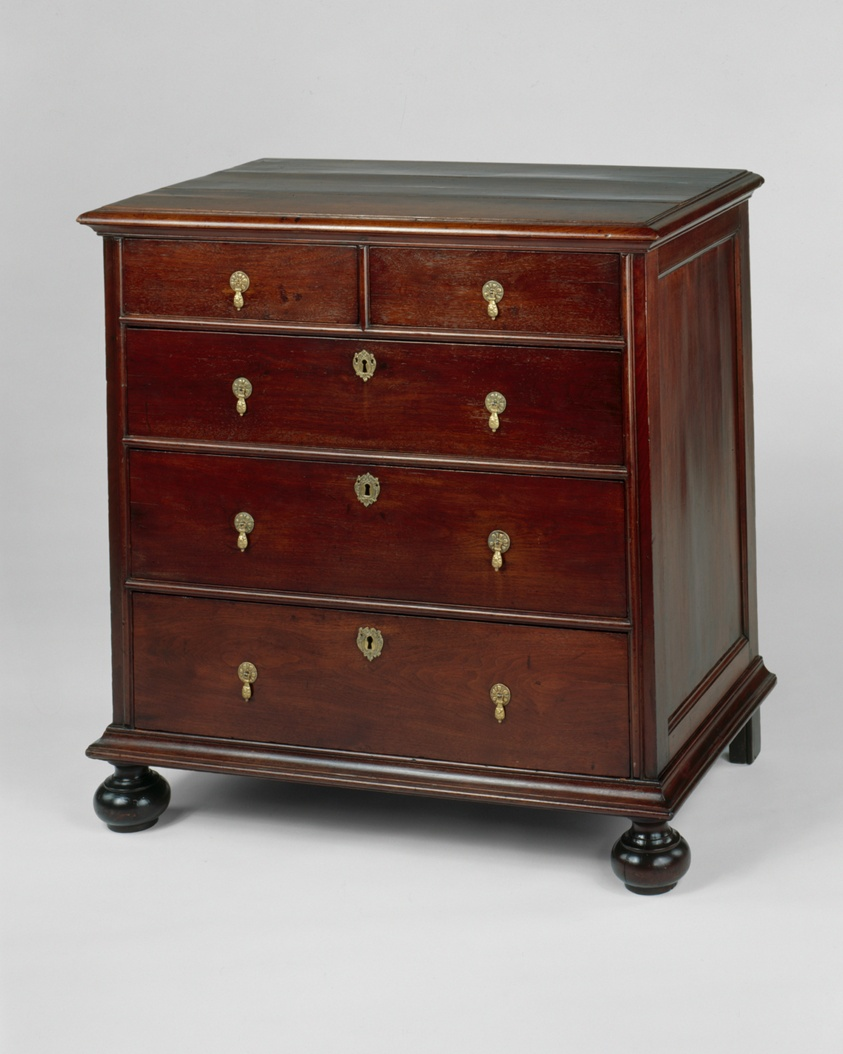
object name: Furniture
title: Chest of Drawers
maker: Artist unknown (American, 18th century); Pennsylvania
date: 1700–30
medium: Walnut, tulipwood, and pine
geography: Pennsylvania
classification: case furniture; furniture; american decorative arts; american arts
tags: furniture